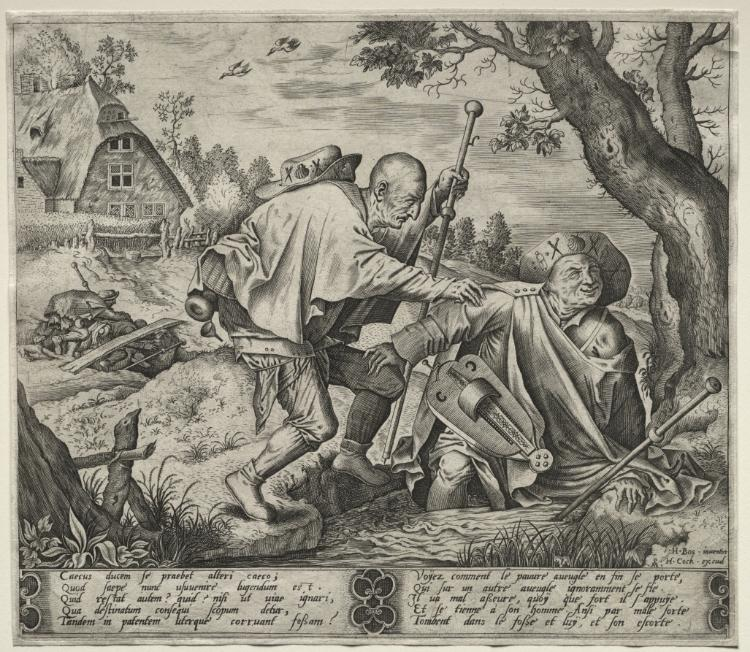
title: The Blind Leading the Blind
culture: Netherlands, 16th century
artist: Pieter van der Heyden (Netherlandish, c. 1530–after 1572)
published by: Hieronymus Cock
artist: after Hieronymous Bosch (Netherlandish, c. 1450–1516)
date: c. 1561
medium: engraving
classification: Print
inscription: lower right, in plate: ·H·Bos · inventor / ·H·Cock · excud / [monogram of Pieter van der Heyden] ; across bottom, in plate; Caecus ducem se' praebet alteri caeco; / Quod saepe' nunc usuuenire' lugendum est. / Quid restat autem? quid? nisi ut uiae ignari, / Qua destinatum consequi scopum detur, / Tandem in patentem uterque' corruant fossam? / Voÿez comment le' pauure' aueugle' en fin se' porte', / Qui sur un autre' aueugle' ignoramment se' fie'. / Jl ua mal asseure', quoÿ que' fort il s'appuÿe'. / Et se' tienne' á son homme'. Ansi par male' sorte' / Tombent dans le' fosse' et luÿ, et son escorte'.